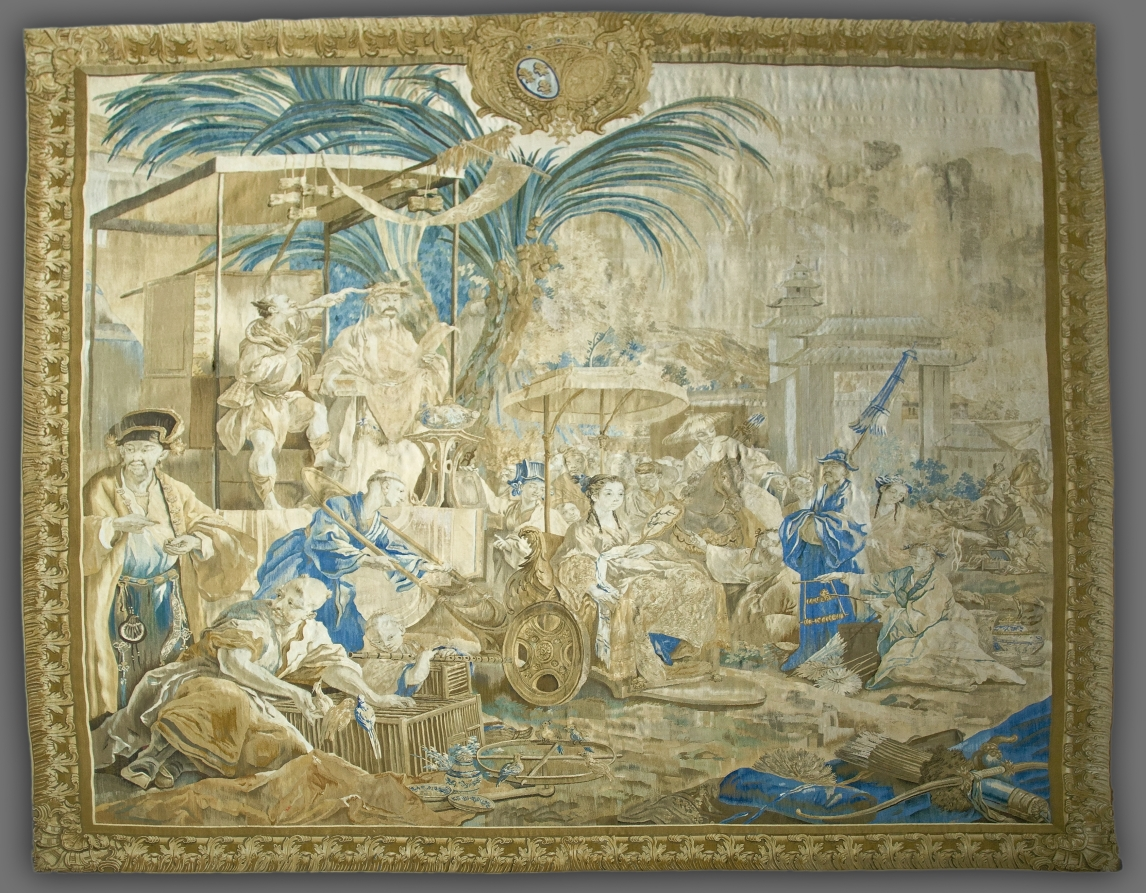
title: Chinese Fair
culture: France, 18th century, Period of Louis XV (1723-1774)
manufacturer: Beauvais (French)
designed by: Jean Joseph Dumons (French, 1687–1779)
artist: after a design by François Boucher (French, 1703–1770)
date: 1723–74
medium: tapestry weave: silk and wool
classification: Tapestry